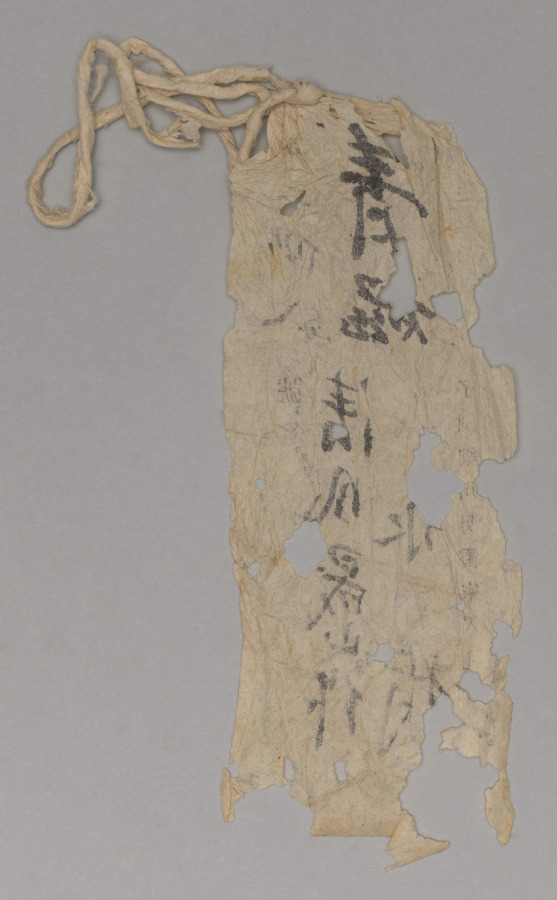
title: Water Container with Peonies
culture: Japan, Meiji period (1868–1912)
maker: Seifū Yohei III (Japanese, 1851–1914)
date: 1900–1914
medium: Porcelain with molded and carved design, green glaze, and black lacquered lid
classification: Ceramic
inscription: 清風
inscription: 帝室技芸員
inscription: 清風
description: This ceramic is an especially accomplished example of Yohei III’s combination of an allover translucent colored glaze with molded and carved designs. It features the peony as its primary motif. The water container, or mizusashi, has a green glaze, and its design takes into consideration the rounded shape and the seated position of the host and guests. It begins low on the body with a flower just beginning to open and continues with another flower a bit higher up, with its petals fully extended and beginning to open outward. It finishes with a flower in full bloom, petals and leaves unfurled and spread outward from the center, now occupying almost the entire surface. The water container once belonged to the Hosokawa family, whose go-between corresponded with Yohei IV about the piece. Yohei IV thanked them for their payment and requested that despite his father’s death in the previous year, they continue to favor the studio with their orders. The letter and its envelope, as well as an auction tag, remain with the object.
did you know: This water container may also serve as a site for cultural reckoning, as when the life cycle of a flower prized in East Asia as a symbol of wealth is displayed across a Japanese chanoyu vessel whose glaze is associated with the seats of power in China and Korea.